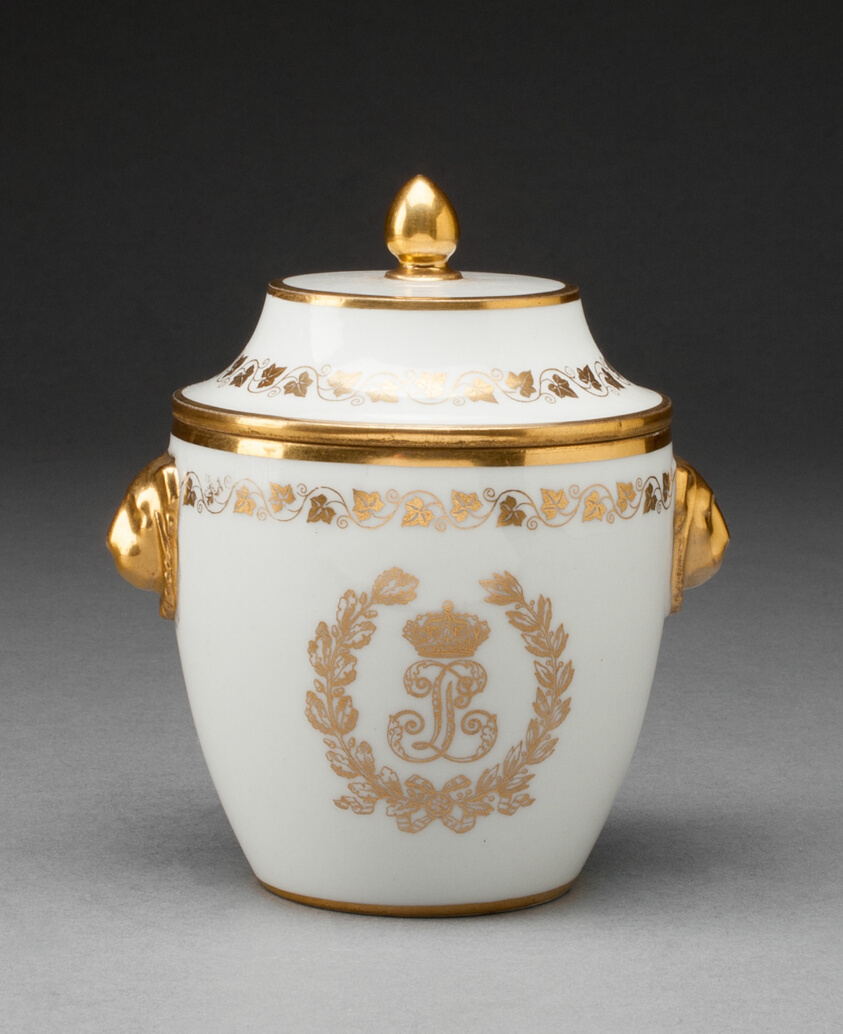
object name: Ceramics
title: Sugar Bowl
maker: Sèvres Porcelain Manufactory; French, founded 1740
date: 1834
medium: Hard-paste porcelain and gilding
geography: Sèvres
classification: sugar bowl; teaware; porcelain; european decorative arts; ceramics